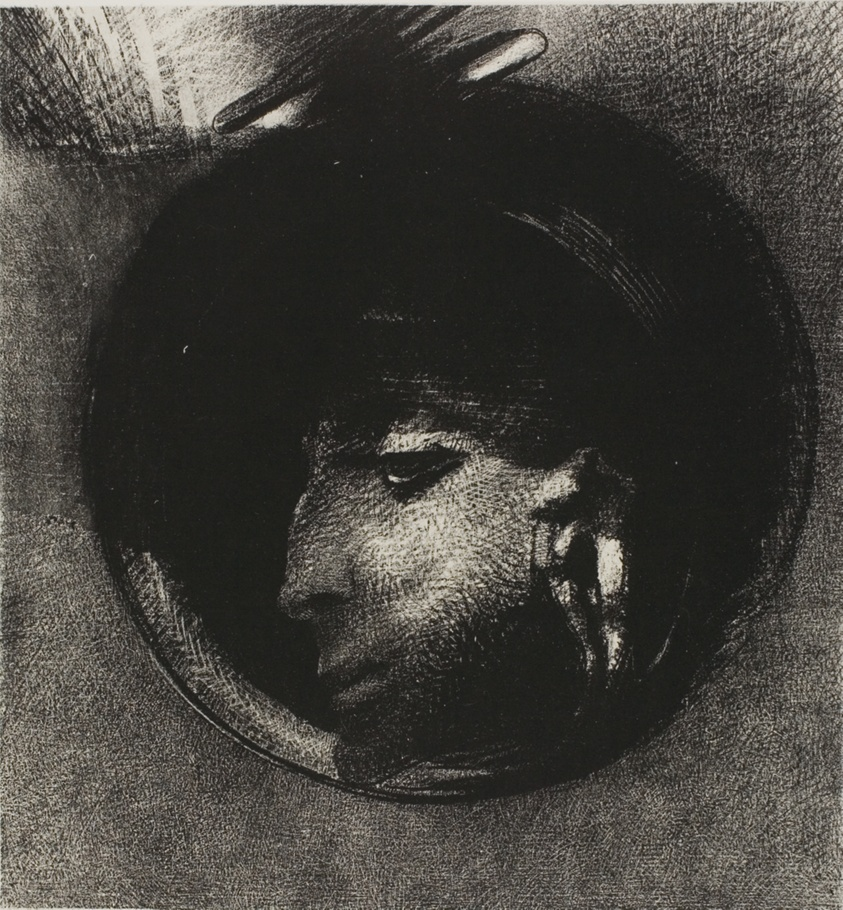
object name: Print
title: Auricular Cell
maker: Odilon Redon (French, 1840-1916)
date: 1894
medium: Lithograph, with scraping on stone, in black on ivory China paper laid down on ivory wove paper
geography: France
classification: lithograph; print; prints and drawing; paper